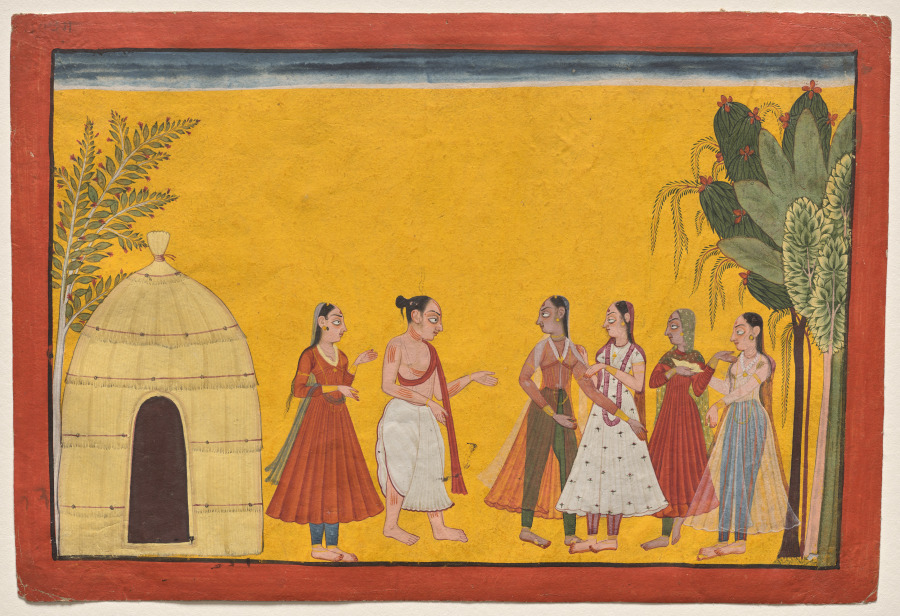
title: Rishyashringa addresses the courtesans, from the "Shangri" Ramayana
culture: Northern India, Pahari kingdoms, Himachal Pradesh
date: c. 1700–1725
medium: Gum tempera and ink on paper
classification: Painting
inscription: [[verso, upper left corner]] bāl. 70 (?)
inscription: [[recto, left margin]] 13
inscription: [[recto, upper left corner]] 13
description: A king sent the courtesans to a forest ashram to convince the ascetic boy Rishyashringa to come back with them to the palace. The king believes that Rishyashringa's presence in the palace will bring about the end of a drought. Rishyashringa had never seen a woman before and was completely bewildered by them.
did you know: This painting remains slightly unfinished, without the final touches of gold.